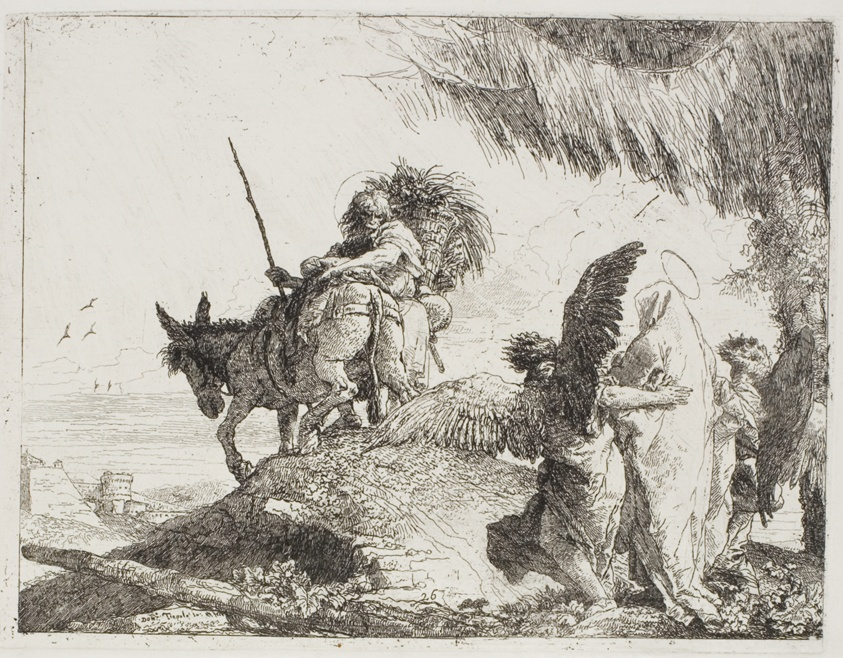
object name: Print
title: Mary, Supported by Two Angels, Follows Joseph, plate 26 from The Flight into Egypt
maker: Giovanni Domenico Tiepolo (Italian, 1727-1804)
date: 1753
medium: Etching on paper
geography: Italy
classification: etching; print; prints and drawing